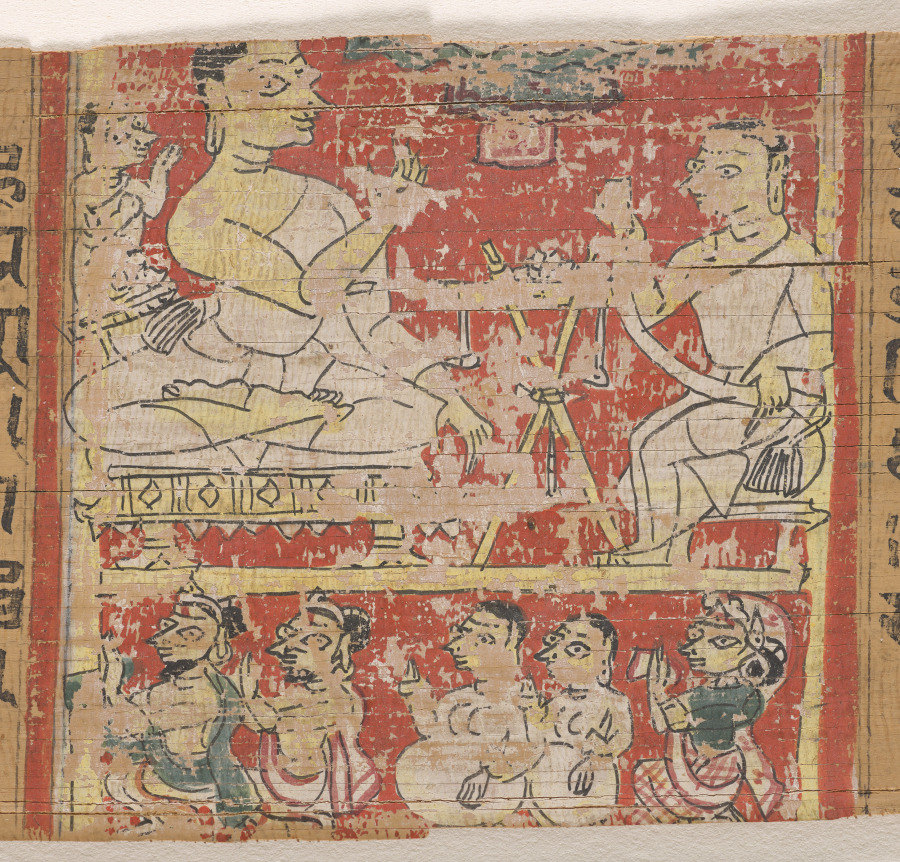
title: Jain monk with disciple and two laymen, two nuns, and a laywoman, folio 22 (recto) from a Yoga-shastra of Hemachandra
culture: Western India, Gujarat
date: c. 1275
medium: Gum tempera and ink on palm leaf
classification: Painting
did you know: The nuns at the bottom cover their breasts by wearing the white robe over both shoulders.